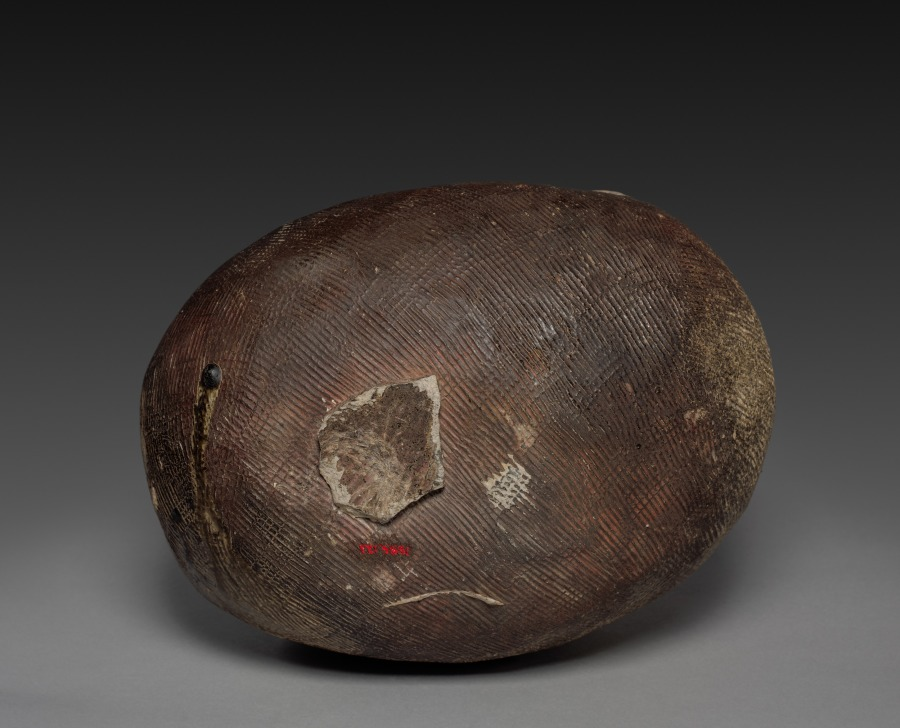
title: Jug with Oblong Body: Sueki Ware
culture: Japan, Nara period (710–94)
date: 700s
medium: stoneware, with impressed decoration and natural ash glaze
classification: Ceramic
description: The unusual shape of this sturdy vessel derives from two deep bowl forms being joined together at their mouths. An opening was then cut out where the separately formed neck and mouth were attached. This vessel shape came to early Japan from Korea, as did the paddled surface decoration technique.The jug's rich surface tonalities were created by wood ash in the kiln chamber that settled on the vessel during firing. The mottled gray areas indicate where large accumulations of ash adhered to the hot body. The darker, green skin that appears shiny or reflective represents generous ash accumulations that vitrified, becoming a natural green glaze. In one area this accumulation is so rich that it formed rivulets of glassy green glaze, propelled across the black matte surface by the fiery winds coursing within the kiln.